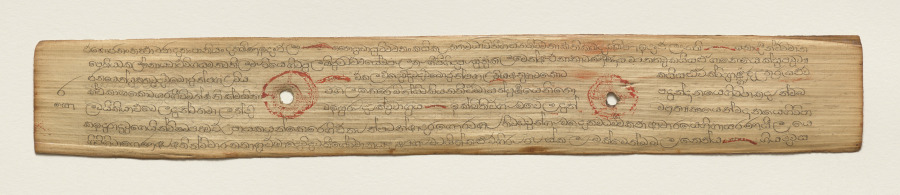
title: Leaf from a Buddhist Manuscript (recto)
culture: Sri Lanka, Singhalese, Late 17th century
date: c. 1700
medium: fiber paper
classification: Manuscript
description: Palm leaf material is still used for manuscripts in Sri Lanka. The palm leaves are prepared first by boiling them, drying them in the sun, and then rubbing them with oils. Scribes then use a metal stylus to incise the text. Then charcoal powder is wiped across the pages, filling in only the inscribed lines.